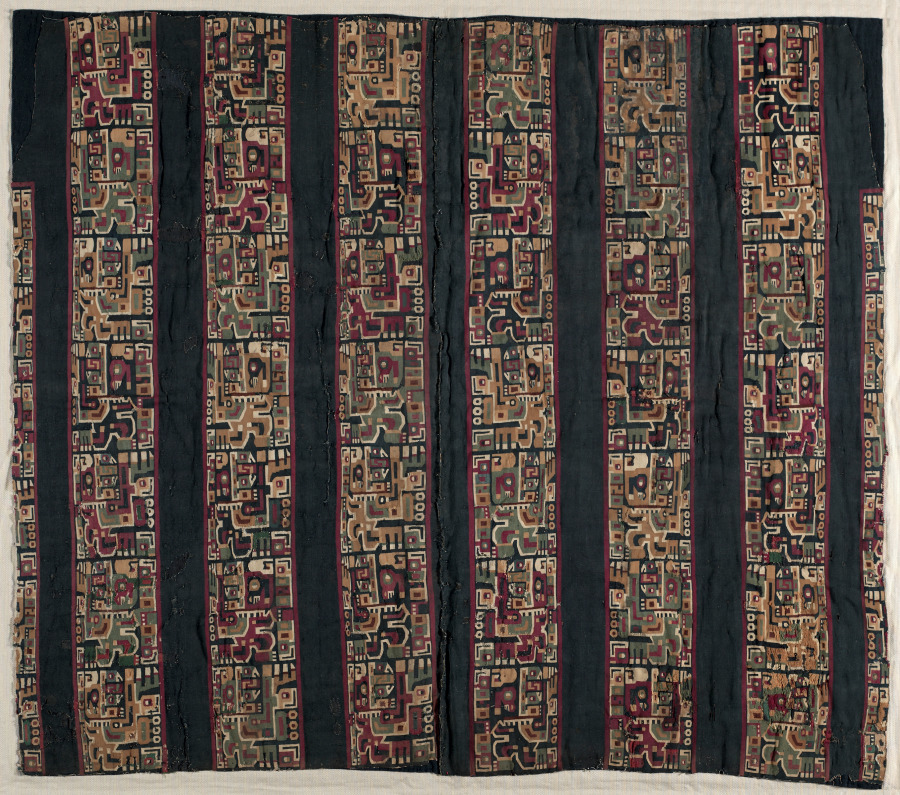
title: Tunic Fragments with Bird-Headed Creature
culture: Central Andes, Middle Horizon, Wari, 6th-11th century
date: 600–1000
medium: Camelid fiber, cotton; tapestry weave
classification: Textile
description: The bird-headed creature in profile that repeats in each of this tunic's design fields gazes upward, holds a staff of authority in front of its body, and wears an ornate headdress behind which a three-feathered wing can be seen. The extremely high technical quality of such tunics suggests that the Wari reserved bird imagery for their most exalted rulers. Here, the original incorporated more than twice as much yarn as the routine--some 19 miles, all handmade and much dyed an inky, dark blue, the most prestigious of Wari colors.